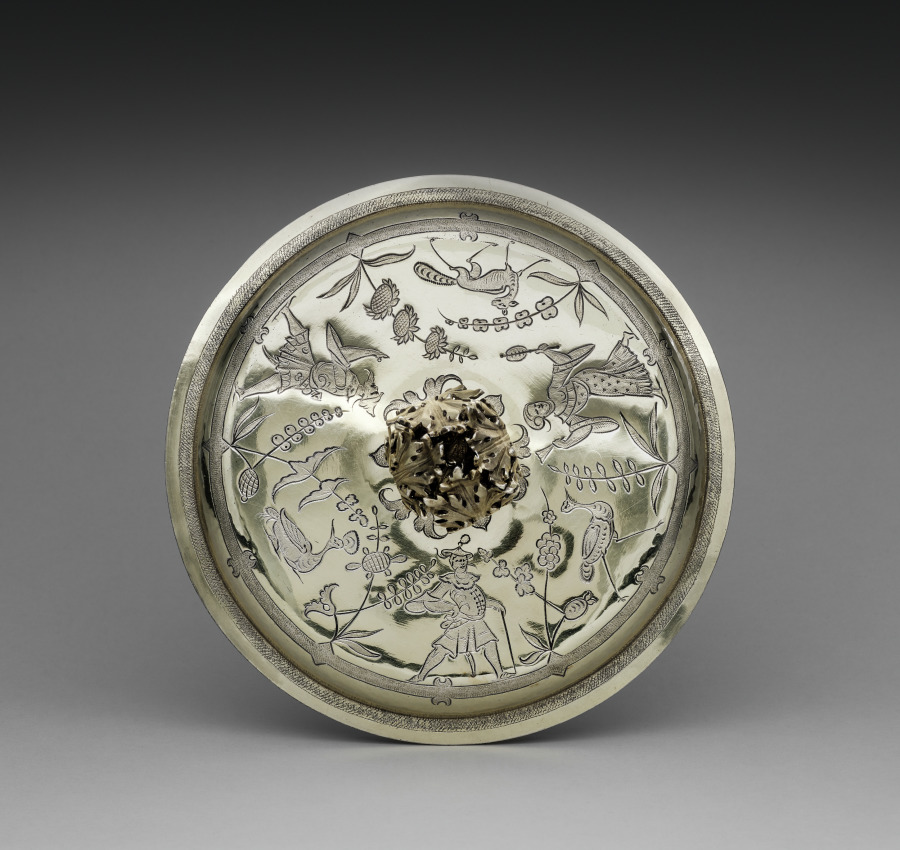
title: Cover for a Two-Handled Cup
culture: England, London, 17th century (James II)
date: 1686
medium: silver gilt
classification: Silver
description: Produced a year after the coronation of James II (1633–1701), this lid and the accompanying cup celebrate the monarchy and reflect the political and social alliances that underpinned the aristocracy during the 1600s. During their coronation, James II and his second wife Mary of Modena (1658–1718) were carried through the city of London under a silk canopy adorned with motifs inspired by European perceptions of Chinese art, known as chinoiserie. Following the procession, the thirty-two lords involved in the ceremony were each offered a portion of the cloth from the canopy as well as sixteen troy ounces of silver from the posts. At least two of them commissioned cups adorned with chinoiserie to be made from the silver. While it is unclear if this cup once belonged to one of the thirty-two peers, it was almost certainly created in response to the same motifs and social developments.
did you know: This lid accompanies a two-handled cup. See cover record.